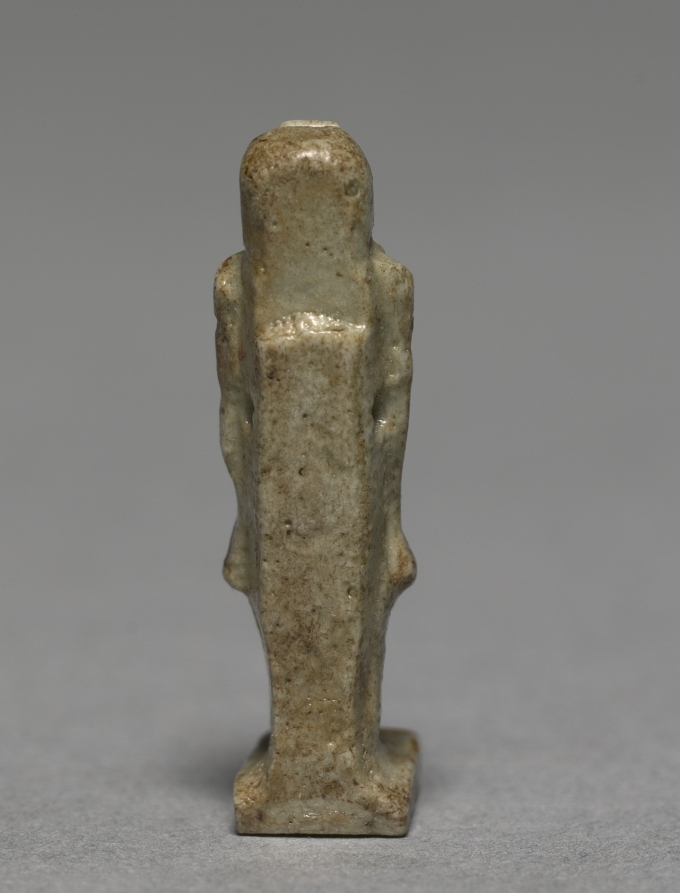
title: Amulet of Thoth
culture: Egypt, Late period (715–332 BCE), Dynasty 30–Greco-Roman period (332 BCE–395 CE), Ptolemaic dynasty (305–30 BCE)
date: 380–30 BCE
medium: gray green faience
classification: Amulets